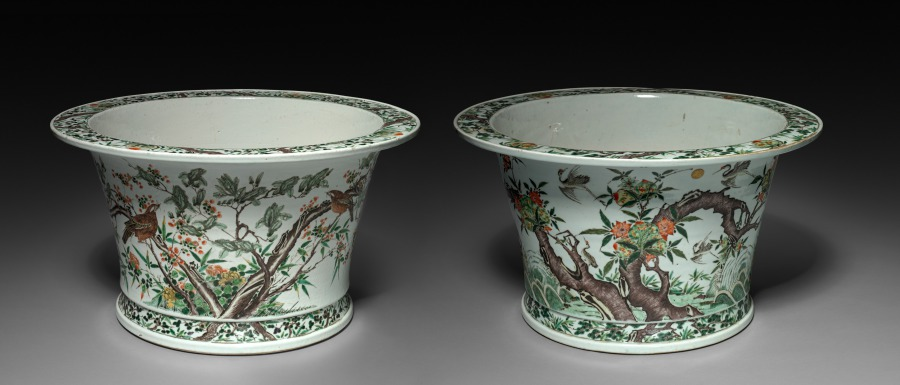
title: Pair of Jardinieres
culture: China, Jiangxi province, Jingdezhen kilns, Qing dynasty (1644-1911), Kangxi reign (1661-1722)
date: 1662–1722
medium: porcelain with famille verte overglaze enamel decoration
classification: Ceramic